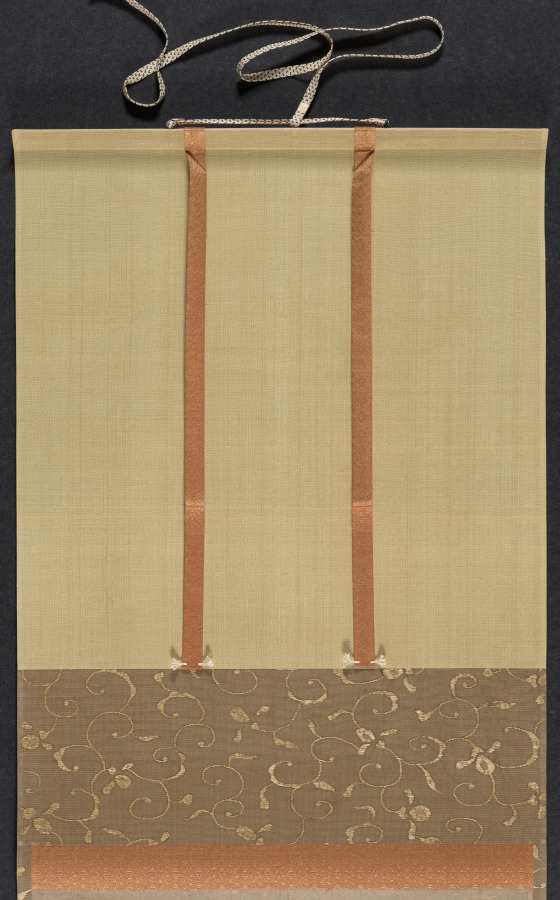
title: Bodhidharma Crossing the Yangzi on a Reed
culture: China, Yuan dynasty (1271-1368)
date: 1300s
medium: hanging scroll; ink on paper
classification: Painting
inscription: 蘆花風起浪頭高，少室岩前去路遙。/ 劫外一花開五葉，腳跟正好喫藤條。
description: Chan Buddhism was introduced to China in the early 500s by the Indian monk Bodhidharma, or Puti Damo (died before 534). Upon his arrival in China, Bodhidharma was allegedly granted an audience with the Liang dynasty emperor Wu (reigned 502–49). Realizing the emperor did not understand his mission, the monk left Nanjing, crossed the Yangzi on a reed, and settled north in Henan province’s Shaolin monastery. Here, Bodhidharma is sketched in few pale brushstrokes. The diluted and swift lines on an empty ground emphasize the Chan idea that all things are illusionary. The inscription reads: Wind rises from the reed flowers, the waves are high; It’s a long way to go beyond the cliff of the Shaoshi mountain; Above the worlds of kalpas a flower is opening into five petals; So that your barefoot heels are just fine for the whipping rattans. —translated by Wai-Kam Ho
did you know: Barefooted Bodhidharma sails across the Yangzi River balanced on a thin stalk of reed.